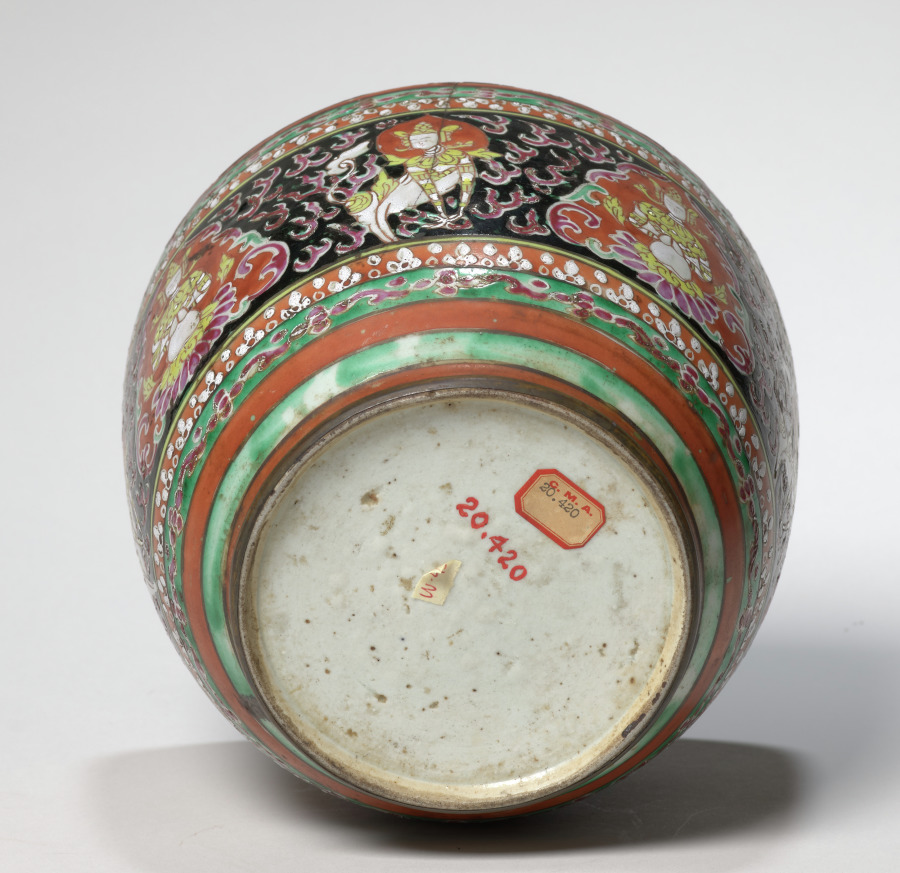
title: Jar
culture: Siam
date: 1800s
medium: porcelain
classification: Ceramic